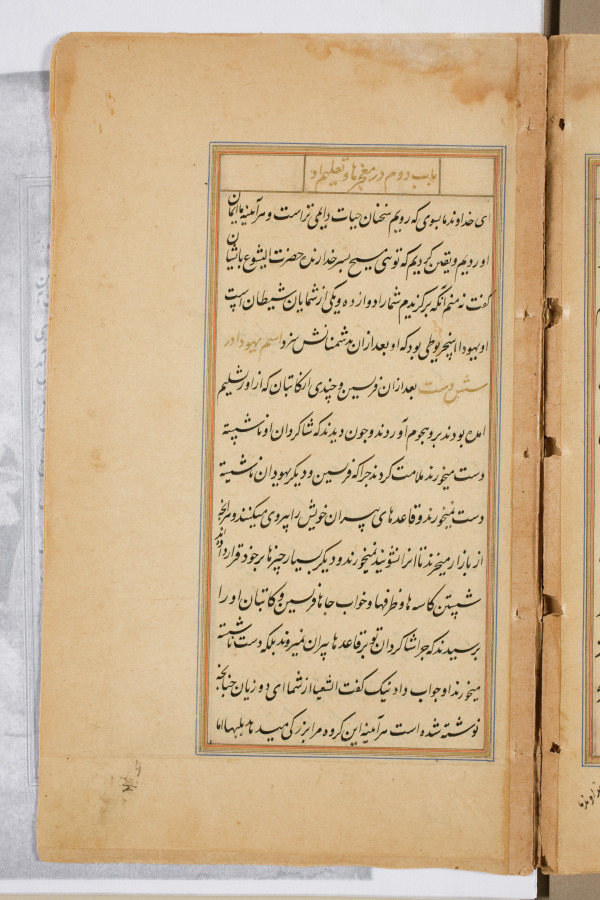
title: Text page from a Mirror of Holiness (Mir’at al-quds) of Father Jerome Xavier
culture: Mughal India, Allahabad, made for Prince Salim (1569–1627)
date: 1602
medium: Ink and gold on paper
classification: Manuscript